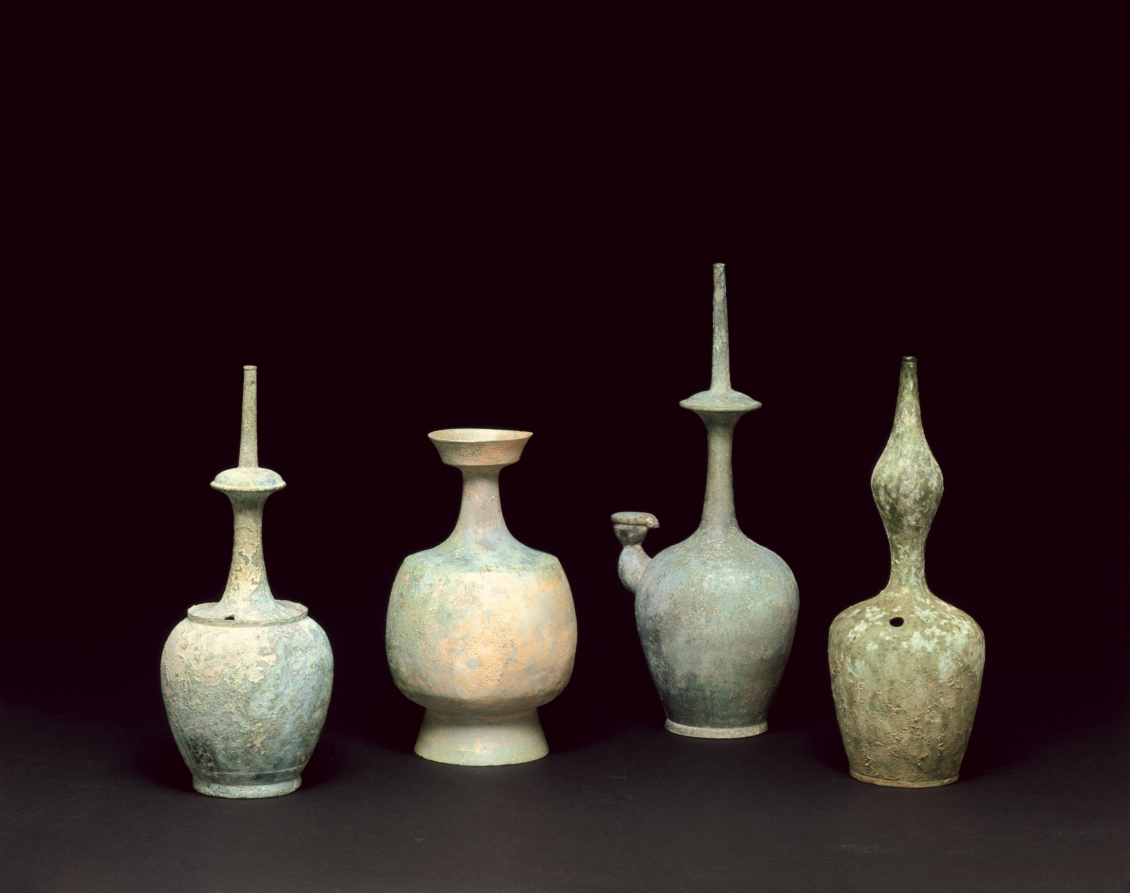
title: Gourd-Shaped Bottle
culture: Korea, Goryeo dynasty (918–1392)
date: 918–1392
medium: bronze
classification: Metalwork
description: As early as the seventh century, the practice of drinking tea and wine became an important part of elite culture in Korea. Elites of the Goryeo period commissioned a variety of types of ceramic and metal utensils including this bronze bottle, not only to make their drinking experience more exciting, but also to show their appreciation of nature.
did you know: This gourd-shaped bottle may have been used to serve wine.